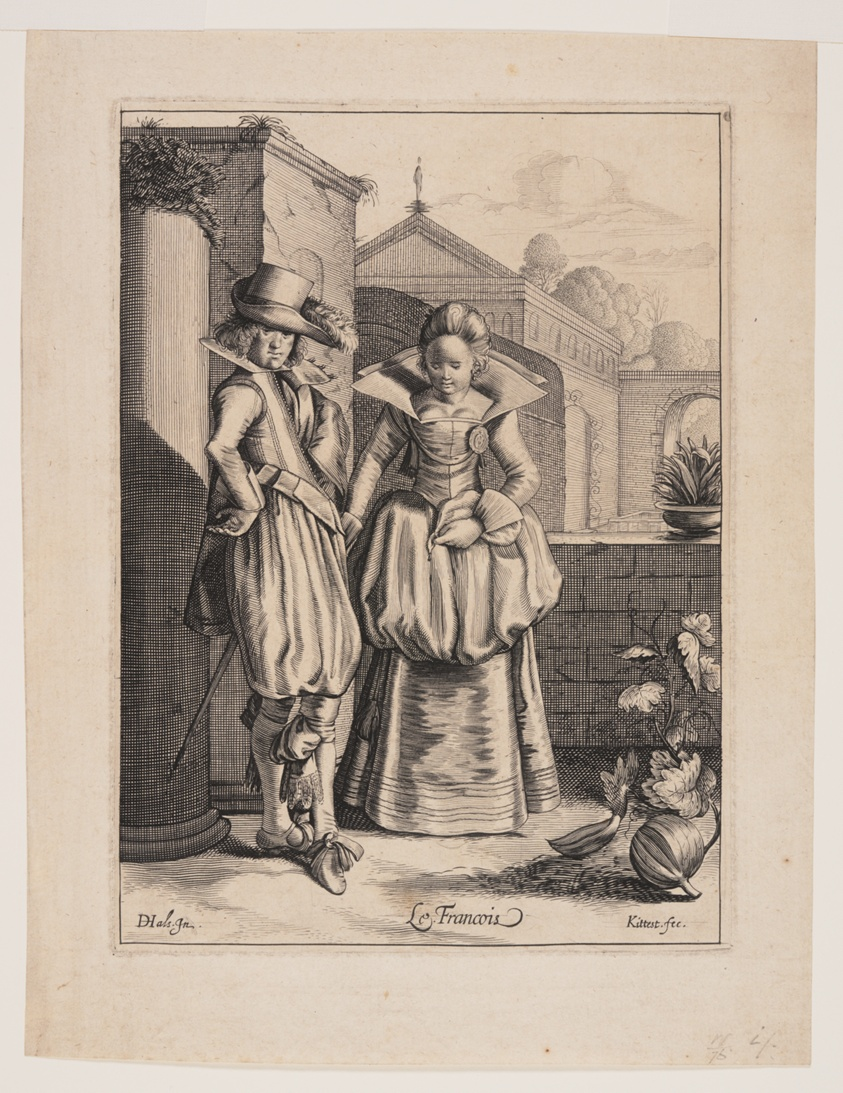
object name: Print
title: Le François (The French)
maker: Cornelis van Kittensteyn (Dutch, c. 1598–c. 1652); after Dirck Hals (Dutch, 1591-1656)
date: c. 1620-40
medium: Engraving on ivory laid paper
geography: Netherlands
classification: engraving; paper; print; prints and drawing